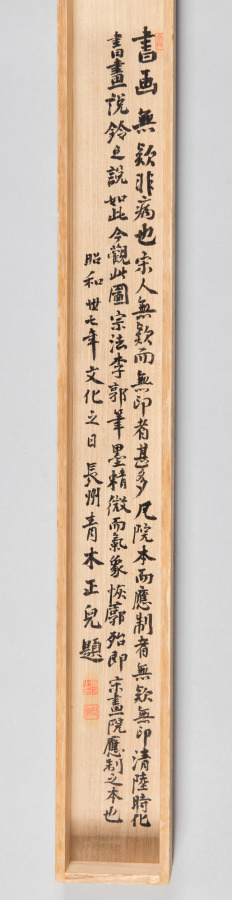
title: Mountain Market, Clear with Rising Mist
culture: Korea, Joseon dynasty (1392–1910)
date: early 1500s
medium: Hanging scroll; ink on silk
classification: Painting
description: This painting depicts several vignettes of the scholar-hermit’s various activities. In the lower left corner, the scholar-hermit is portrayed welcoming his guest in the courtyard. In the middle section on the lower bottom, the scholar and his guest are shown encountering another traveler on the bridge and exchanging their greetings. After crossing the bridge, the scholar visits a friend who lives in a compound of multiple buildings. The two friends decide to take a short walk. Both appear in a terraced cliff, enjoying a mountain vista and the fragrance of an old pine tree carried by the gentle wind. The scholar continues his journey with his two servants. They are portrayed crossing a winding wooden bridge. Right beyond the colossal rocky mountain, a panoramic view to a bustling market place unfolds, suggesting that it may be the place where the scholar-hermit’s entourage would visit. Perhaps the scholar need to buy items such as books, rolls of papers, and brushes, all essential to scholarly life. Toward the upper left corner, another group of travelers is landing on the river bank that leads to the city gate; they may be headed to the multistoried Buddhist stupa nestled on the top of the mountains.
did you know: Due to its stylistic features, this painting has long been believed to be a Chinese painting of the Northern Song period, dated to the 12th century.